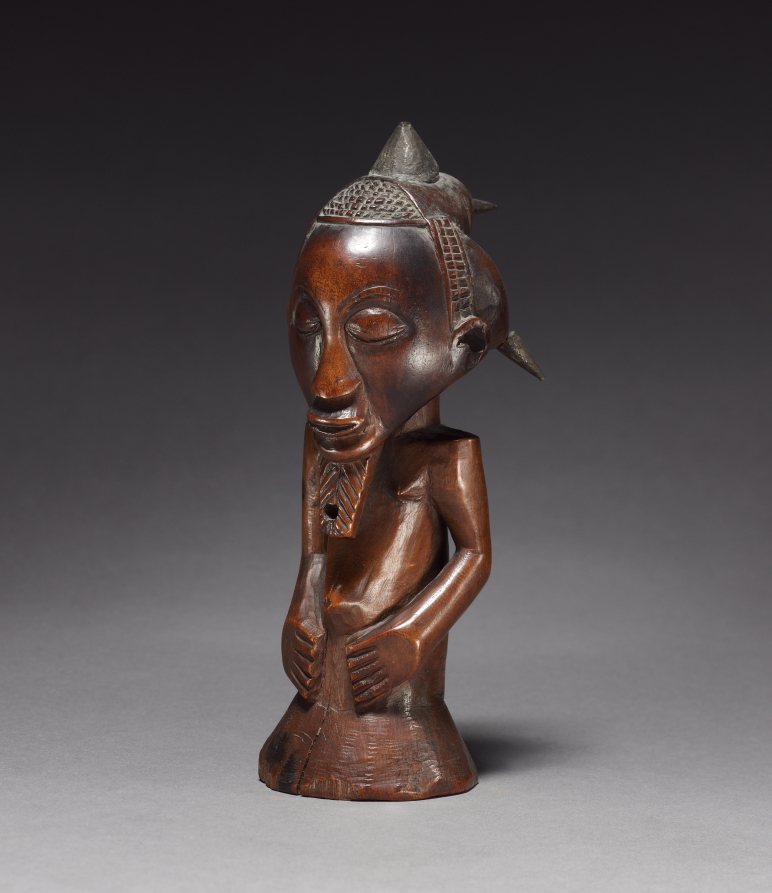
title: Half-Figure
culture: Africa, Central Africa, Democratic Republic of the Congo, probably Kusu-style maker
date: late 1800s–early 1900s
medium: Wood and iron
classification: Sculpture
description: Iron tacks inserted into the lobes of the hairdo indicate that this sculpture was originally empowered with magical and medicinal substances. Thus charged, the figure would have been used in divination and was related to a powerful association known as Bugabo. Members specialized in healing, hunting, and fighting crime.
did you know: This figure would have been used in a powerful association known as Bugabo, specializing in healing, hunting, and fighting crime.